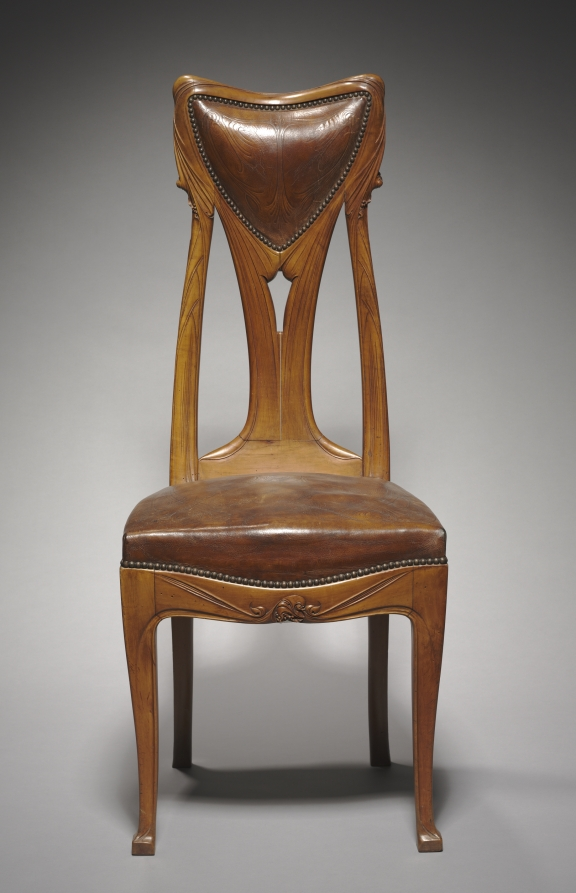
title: Chair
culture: France, 20th century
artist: Hector Guimard (French, 1867–1942)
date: c. 1907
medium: pearwood with tooled leather back and seat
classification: Furniture and woodwork